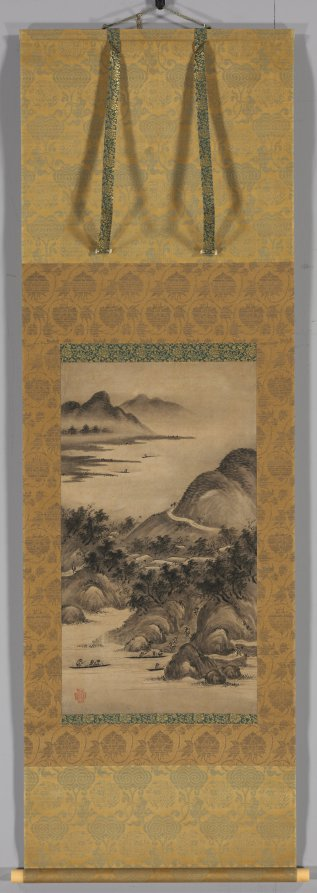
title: Seasonal Landscapes: Summer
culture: Japan, Muromachi period (1392–1573)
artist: Kano Hideyori (Japanese, active mid- to late 1500s)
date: mid- to late 1500s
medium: hanging scroll, ink on paper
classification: Painting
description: Now comprising three scrolls, this composition was originally a set of four paintings depicting the seasons. The set is among the most important of the artist’s surviving works. Each painting was executed in the gyō mode, indicating a speedy brush with rounded strokes. The terms shin (formal), sō (cursive), and gyō (semicursive), borrowed from calligraphy terminology, are terms commonly used by connoisseurs to describe brushwork in ink paintings.